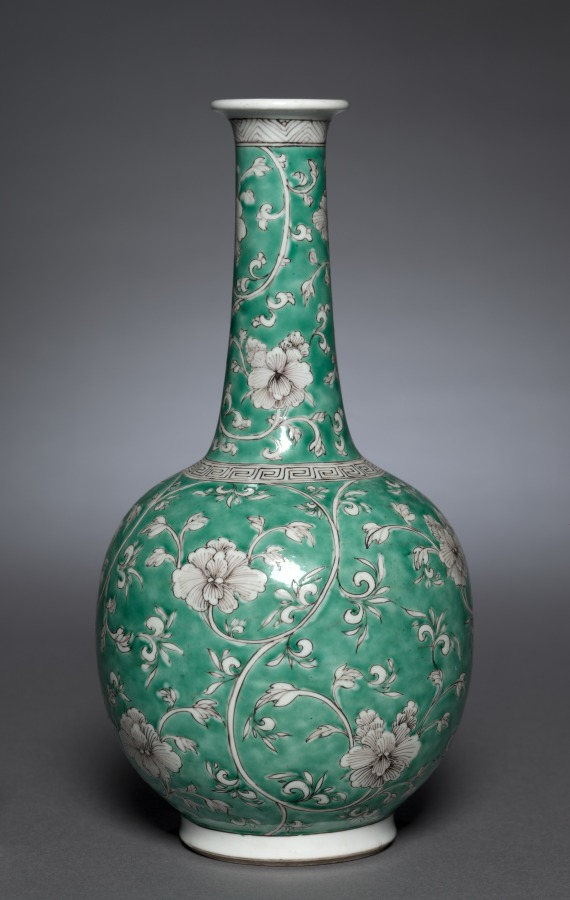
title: Pair of Bottle Vases with Floral Scrolls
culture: China, Qing dynasty (1644-1911), Kangxi reign (1661-1722)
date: 1662–1722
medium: porcelain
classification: Ceramic